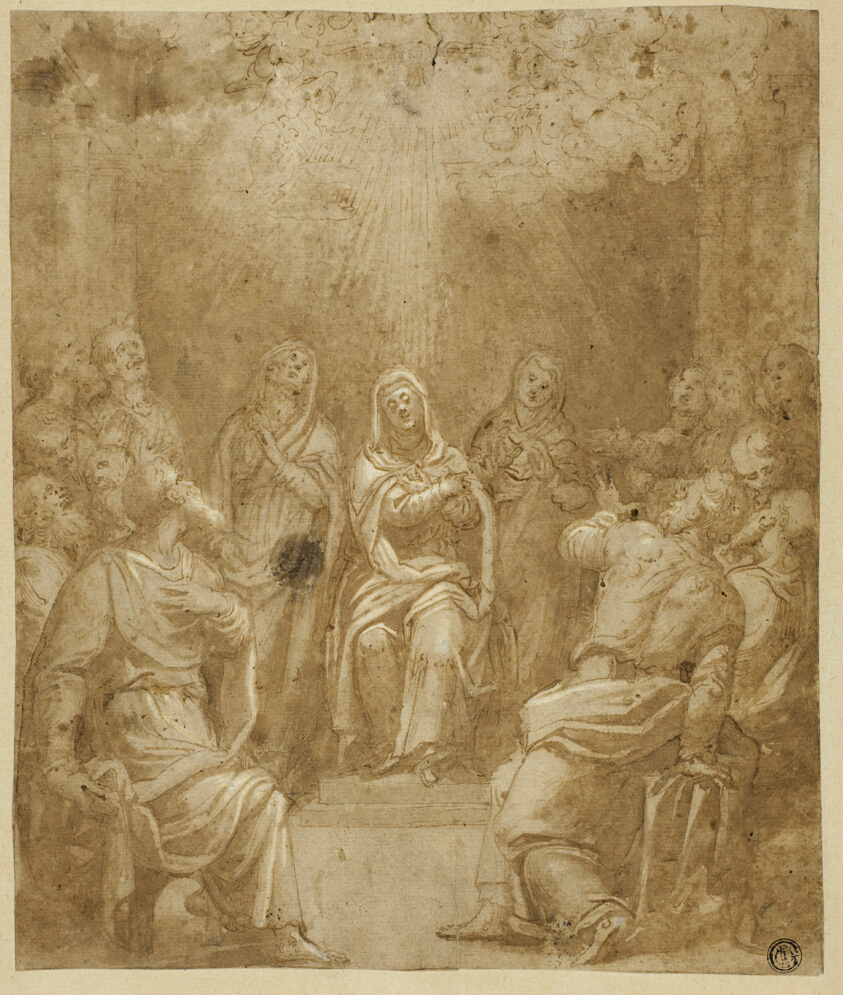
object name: Drawing and Watercolor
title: Study for the Pentecost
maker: Simone Peterzano (Italian, 1573-1596)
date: c. 1580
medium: Pen brown ink and brush and brown wash, heightened with lead white (with later additions to left knee and face of Virgin), over traces of black chalk, on ivory laid paper, laid down on tan laid paper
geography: Italy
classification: pen and ink drawings; drawings (visual works); prints and drawing